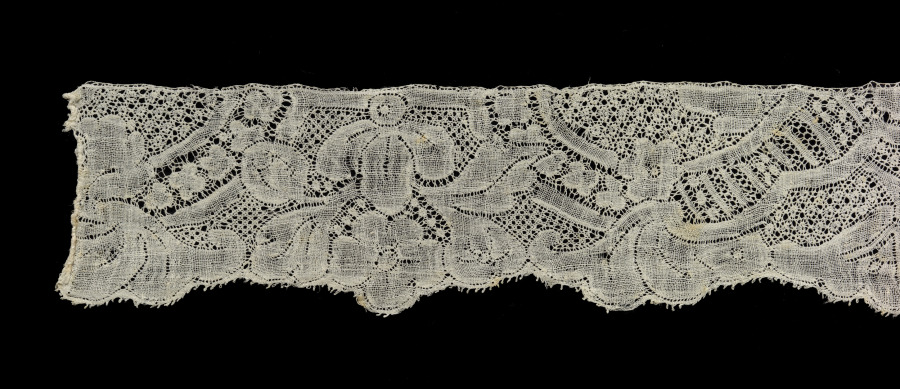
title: Lace Edging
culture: Belgium, Binche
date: 1700s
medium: Linen: bobbin lace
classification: Lace